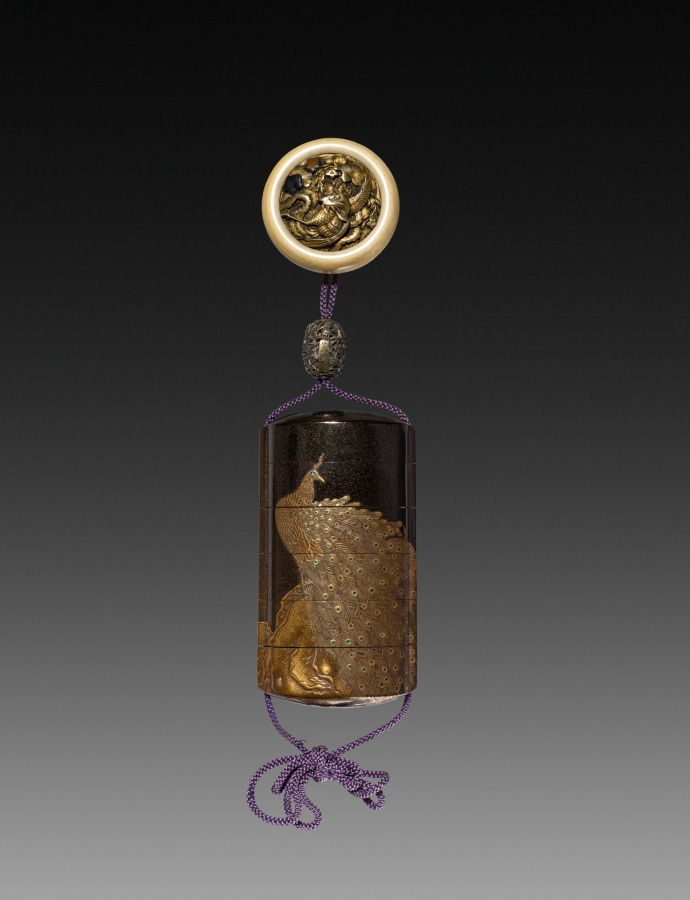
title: Inro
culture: Japan, Edo period (1615–1868)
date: early 1800s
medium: lacquer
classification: Lacquer